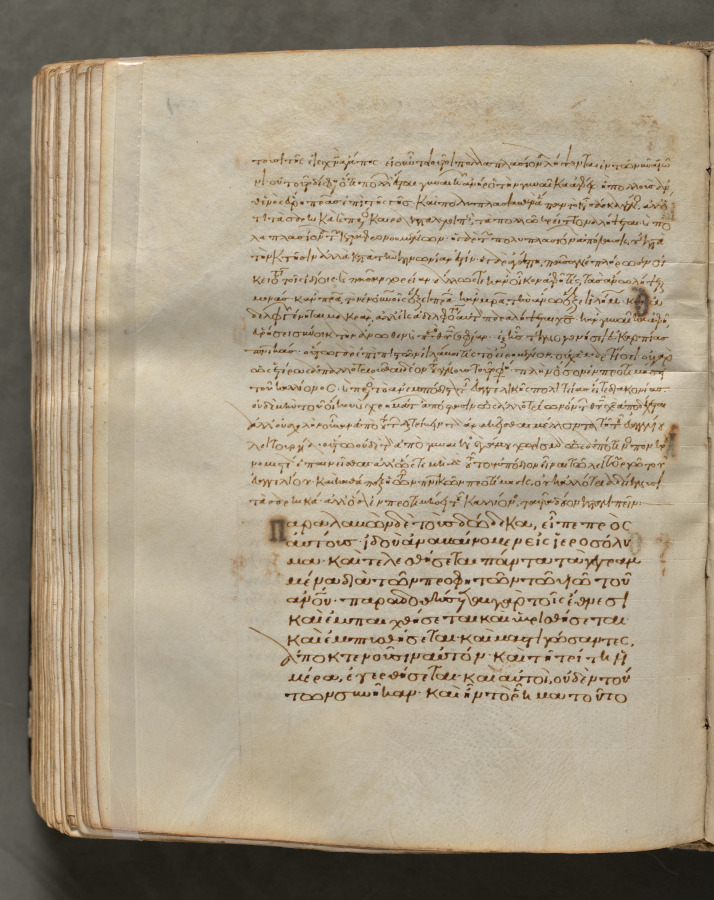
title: Text, folio 292 (verso), from a Gospel Book with Commentaries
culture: Byzantium, Constantinople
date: c. 1000–1100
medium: ink, tempera, and gold on vellum; leather binding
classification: Bound Volume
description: Each of the four gospels in this book opens on a page with brilliantly illuminated borders depicting the author of the text as well as birds—principally peacocks, symbols of the immortality of the soul—and fountains, representing the fountain of life and the salvation of the soul. This volume consists of 428 leaves with texts in Greek. Its level of sophistication suggests that it was probably written and decorated in a monastery in Constantinople.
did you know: Gospel books were carried in procession through Byzantine churches.